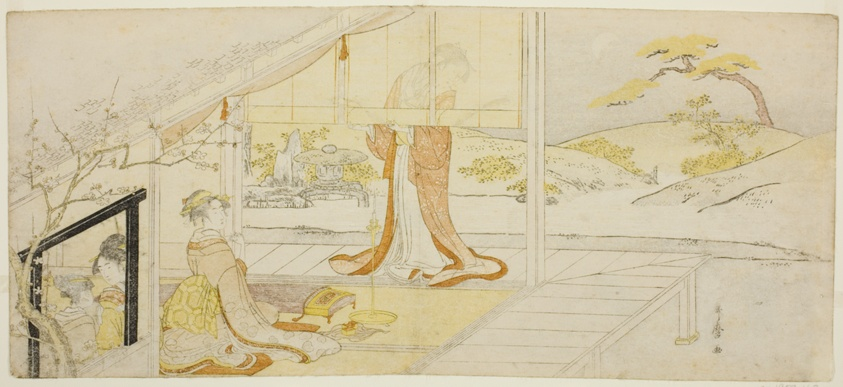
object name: Print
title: Parody of a scene from "The Pillow Book"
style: Japanese (culture or style)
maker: Kitagawa Utamaro 喜多川 歌麿; Japanese, 1753 (?)-1806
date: c. 1793/97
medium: Color woodblock print; horizontal o-tanzaku, surimono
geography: Japan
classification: woodblock print; print; asian art